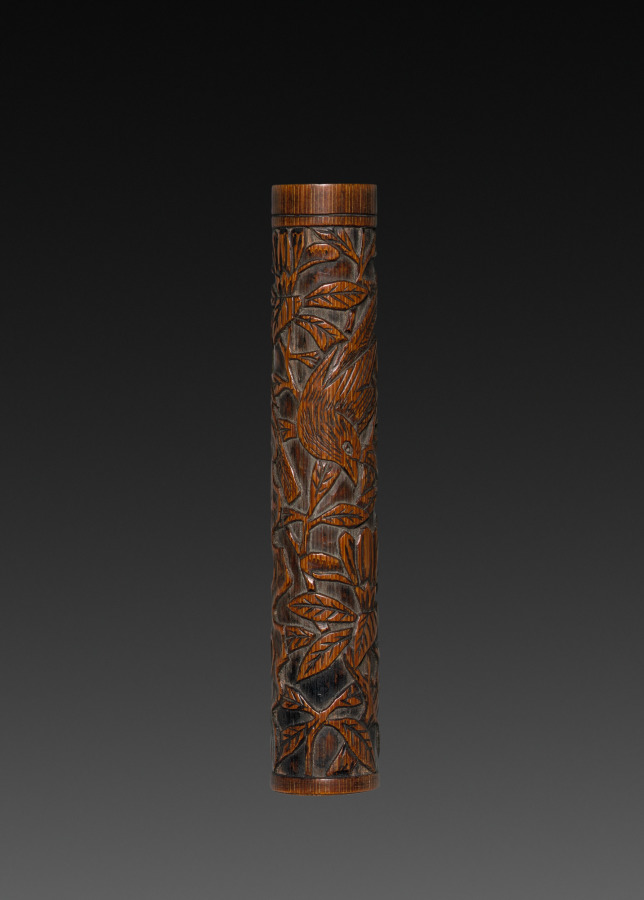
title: Brush with Carved Designs (brush cap)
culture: China, Ming dynasty (1368-1644), Wanli mark and reign (1573-1619)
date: 1573–1619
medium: carved bamboo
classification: Wood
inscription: 大明萬曆年製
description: In China, access to political power was granted to those who passed the civil service examinations, a system that offered official service only at a high level of education. Chinese literati-officials, whose daily routine involved administrative work in an office, enjoyed precious objects on their writing desks that offered distraction and demonstrated good taste. By the Ming (1368–1644) and Qing (1644–1911) dynasties, these utensils of the literati studio became also collectibles and were treasured as artworks. A brush, like this one, was essential for both administrative tasks and for artistic creation. The bamboo brush handle and cap were carved in shallow relief with branches, leaves, birds, and flowers. The brush tip was made from fine white animal hairs.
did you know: The inscription on this brush with a bamboo cap reads: Made during the Wanli Era of the Great Ming [dynasty].